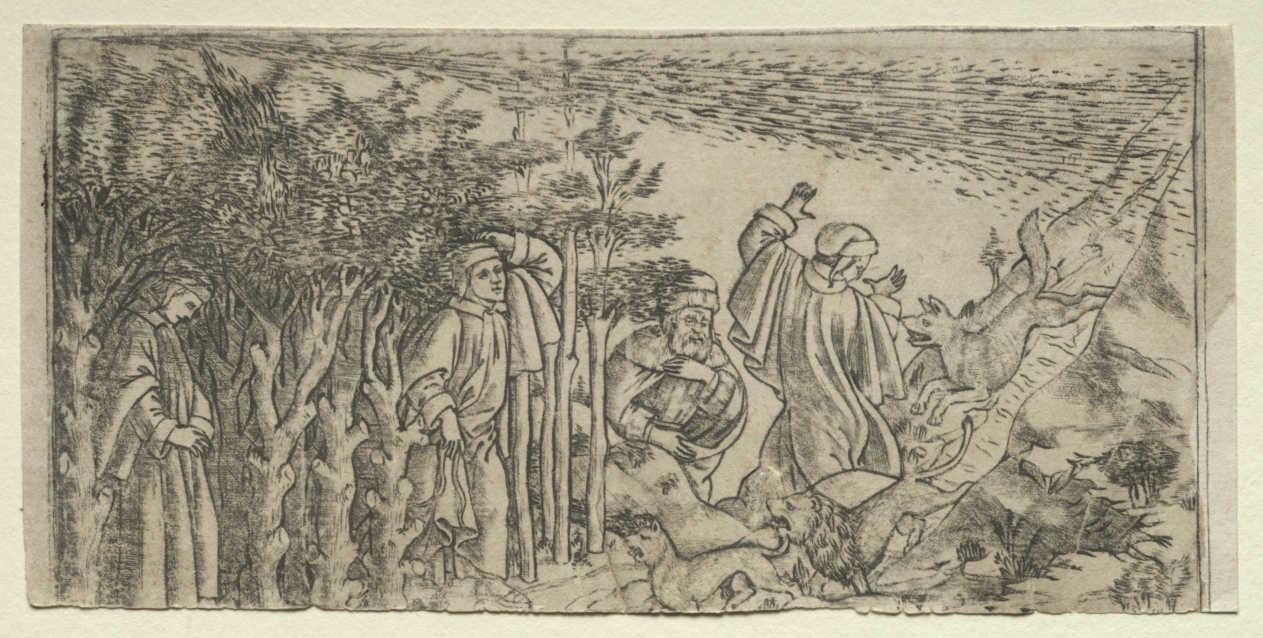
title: Dante Lost in the Wood: Escaping and Meeting Virgil, Canto I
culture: Italy, Florence, 15th century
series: 2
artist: Baccio Baldini (Italian, c. 1436–1487)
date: 1481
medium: engraving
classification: Print